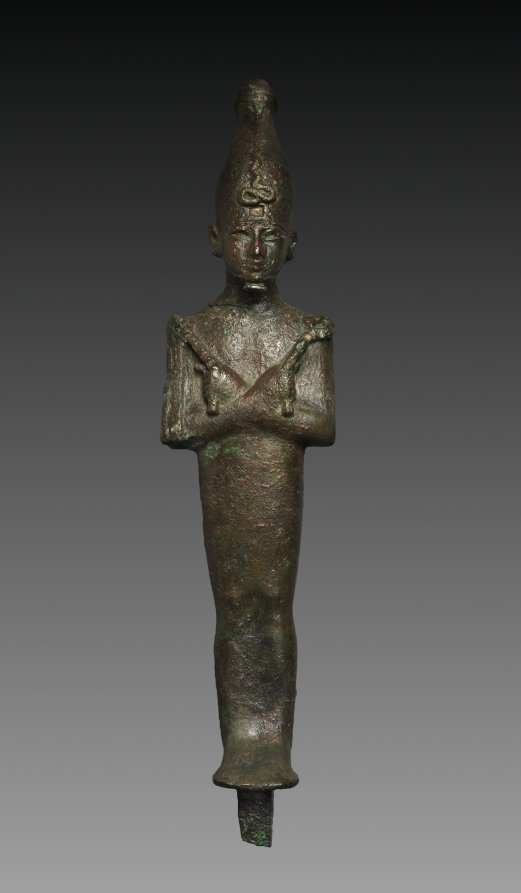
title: Statuette of Osiris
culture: Egypt, Late period (715–332 BCE), Dynasty 26 or later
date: 664–525 BCE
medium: black copper (?), hollow cast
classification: Sculpture